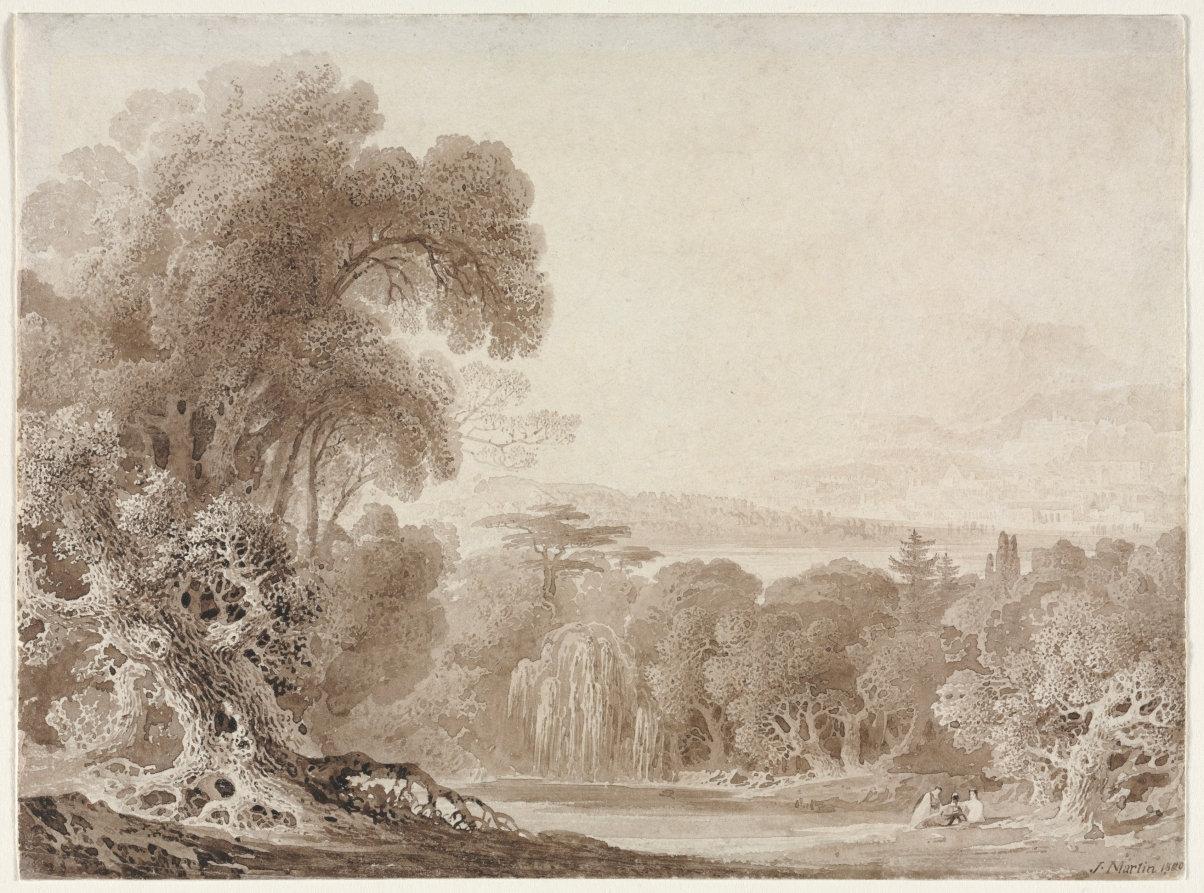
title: Figures Seated by a Lake in a Wooded Landscape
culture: England, 19th century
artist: John Martin (British, 1789–1854)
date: 1820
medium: brown wash and point of brush with graphite underdrawing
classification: Drawing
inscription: signed and dated, in brown ink, at lower right: J. Martin 1820; inscribed, in graphite, on verso, at center: William / No. 3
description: Before he became famous as a history painter, John Martin earned a living by teaching and painting watercolors. His so-called sepia drawings, landscapes in monochromatic wash, found an enthusiastic audience. The artist’s method for painting foliage in these drawings was idiosyncratic; form and texture were created almost entirely in negative spaces without the use of line. Highlighted leaves, bark, vines, and roots were delineated with the white of the paper, creating a peculiar, instantly recognizable, spongy effect.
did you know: John Martin's biographer believed that his early landscapes, such as this one, were inspired by classical texts by Ovid.